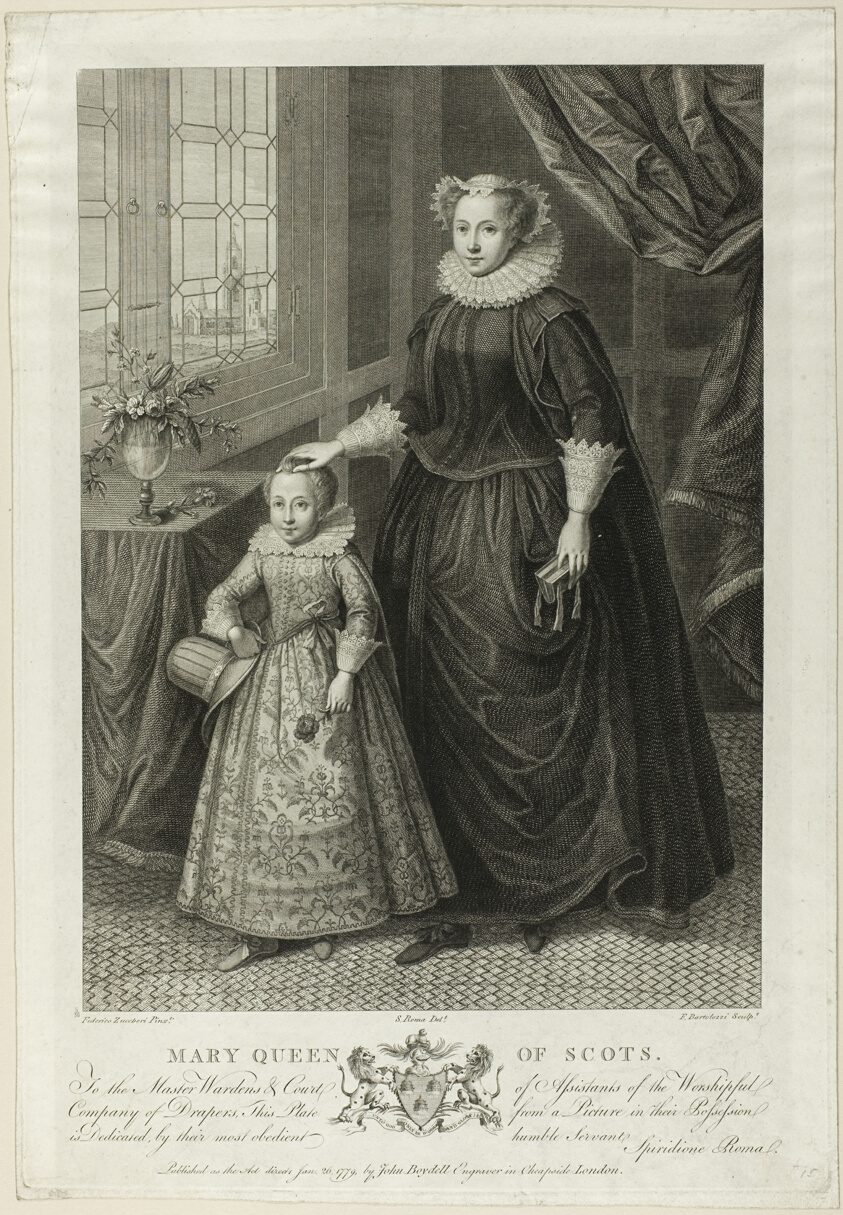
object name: Print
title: Mary Queen of Scots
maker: Francesco Bartolozzi (Italian, 1727-1815); after Frederico Zuccaro (Italian, c. 1542-1609); published by John Boydell (English, 1719-1804)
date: published January 26, 1779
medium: Engraving on ivory wove paper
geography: Italy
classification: engraving; print; prints and drawing